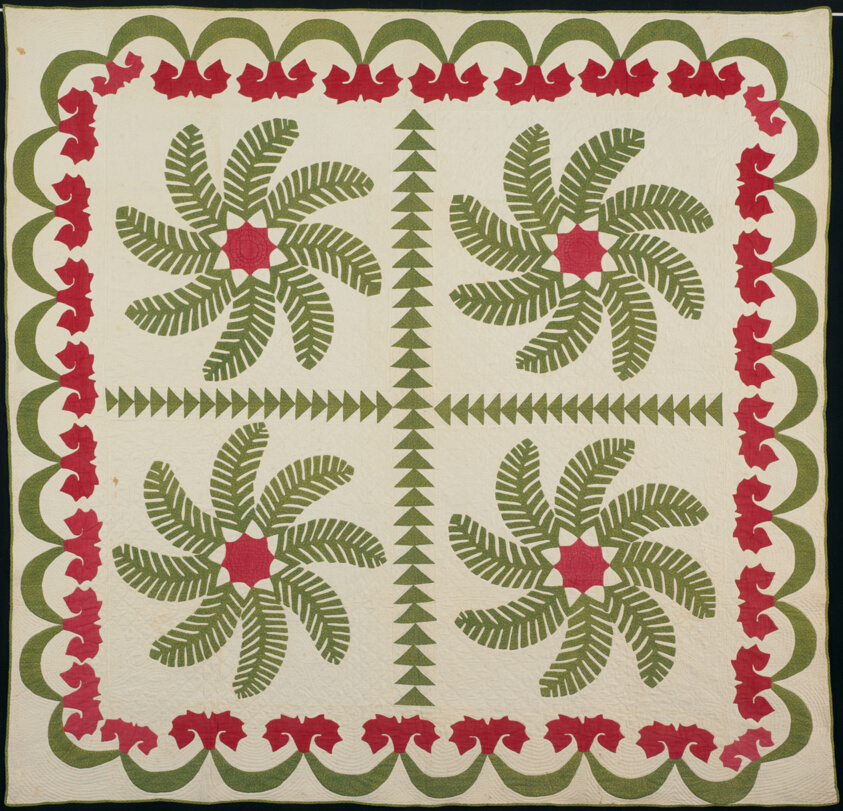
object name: Textile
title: Bedcover (Princess Feather or Ostrich Plume Quilt)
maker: United States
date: c. 1850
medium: Cotton, plain weave; appliquéd with cotton, plain weave and cotton, plain weave roller printed; quilted with cotton; edged with cotton, plain weave roller printed; Backing: cotton, plain weave; padding: cotton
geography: United States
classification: textile; needlework - quilt